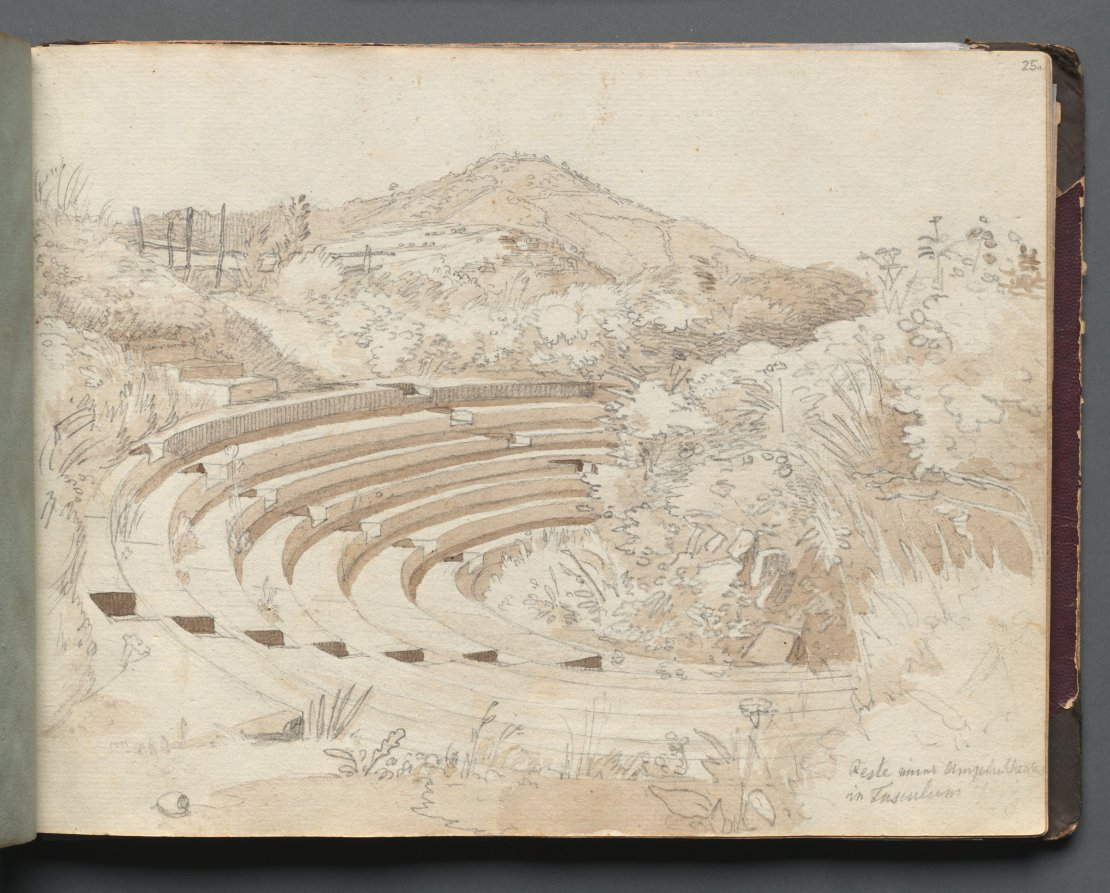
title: Album with Views of Rome and Surroundings, Landscape Studies, page 25a: Amphitheater, Tusculum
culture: Germany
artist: Franz Johann Heinrich Nadorp (German, 1794–1876)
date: c. 1830s-70s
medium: graphite with brown wash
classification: Bound Volume